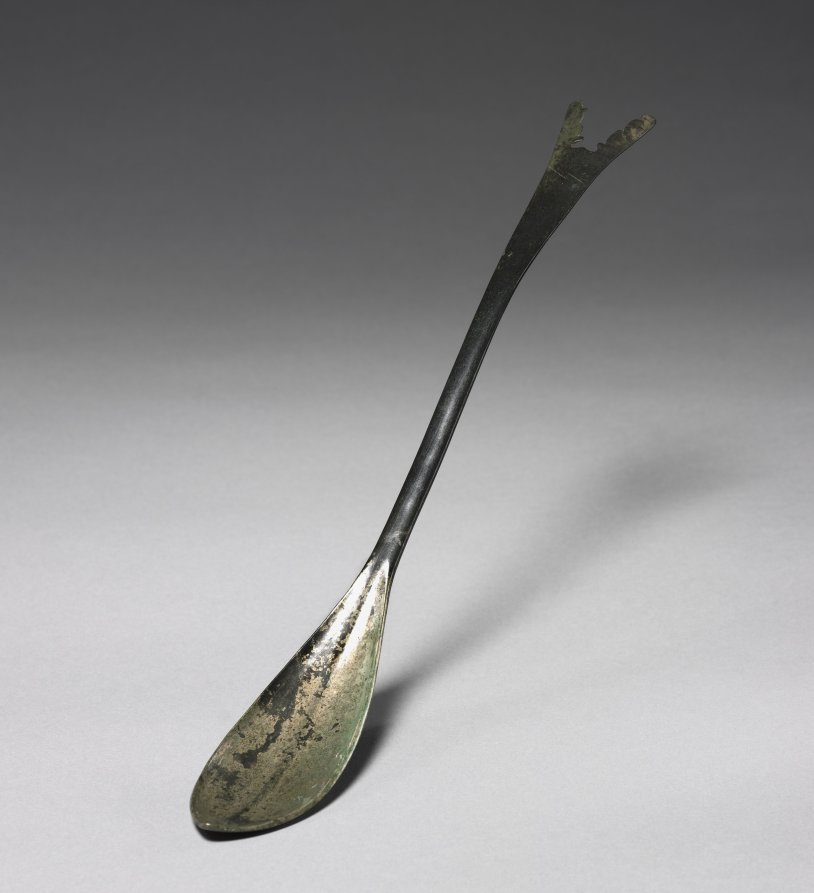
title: Spoon with Fish-Tail Design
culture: Korea, Goryeo dynasty (918–1392)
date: 918–1392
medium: bronze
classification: Metalwork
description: Many of Goryeo period spoons like this one feature a curved handle that splits into a jagged fishtail design. This fishtail design is not unique to Korea; it was also widely used in the area under the rule of two non-Han Chinese states: Liao (907–1125) and Jin (1115–1234). These seemingly ordinary objects testify to exciting material interactions between the Goryeo dynasty and non-Han Chinese northern states, which were often omitted from the official records.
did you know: Bronze spoons are the most common burial item. This particular example bears an inscription at the back of the handle end.